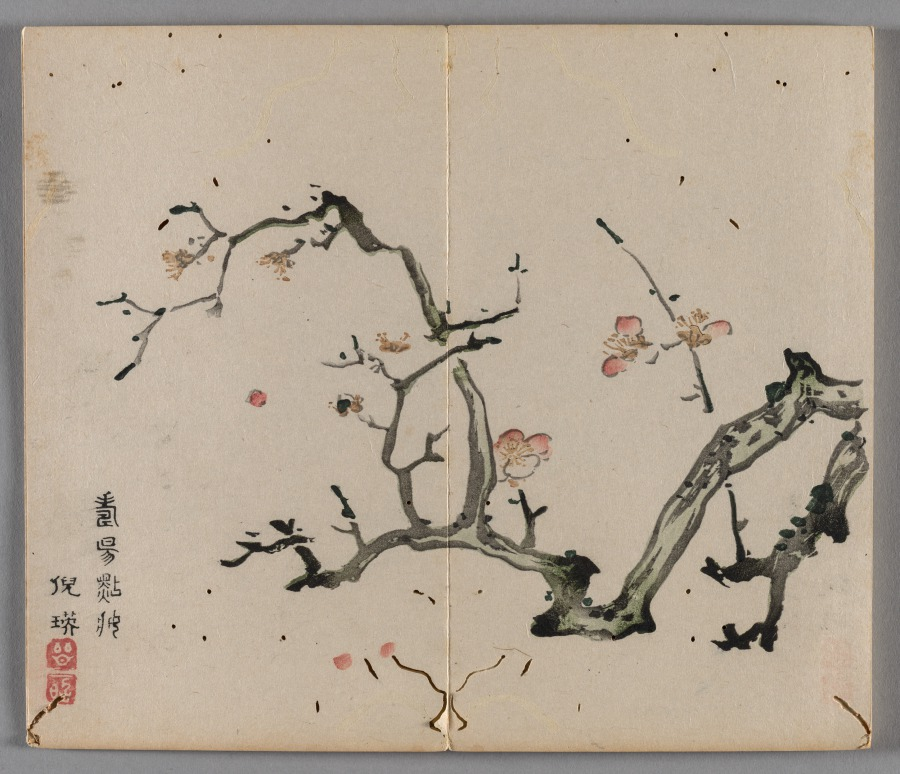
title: Ten Bamboo Studio Painting and Calligraphy Handbook (Shizhuzhai shuhua pu): Plum Blossoms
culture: China, Qing dynasty (1644-1911)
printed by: Hu Zhengyan (Chinese, c. 1584–1674)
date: 1633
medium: Woodblock-printed book; ink and colors on paper; first edition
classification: Print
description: Color printing reached a level of perfection in the early 1600s, as seen in this Ten Bamboo Studio Collection of Calligraphy and Painting and the Mustard Seed Garden Manual of Painting (printed 1679 and 1701). The painterly quality, precision in registering (aligning) the woodblocks, and harmonious colors made them the most successful color print editions in Chinese history. Both editions were printed and compiled in Nanjing, spread nationwide, and had a great impact on the arts in Japan and Korea.